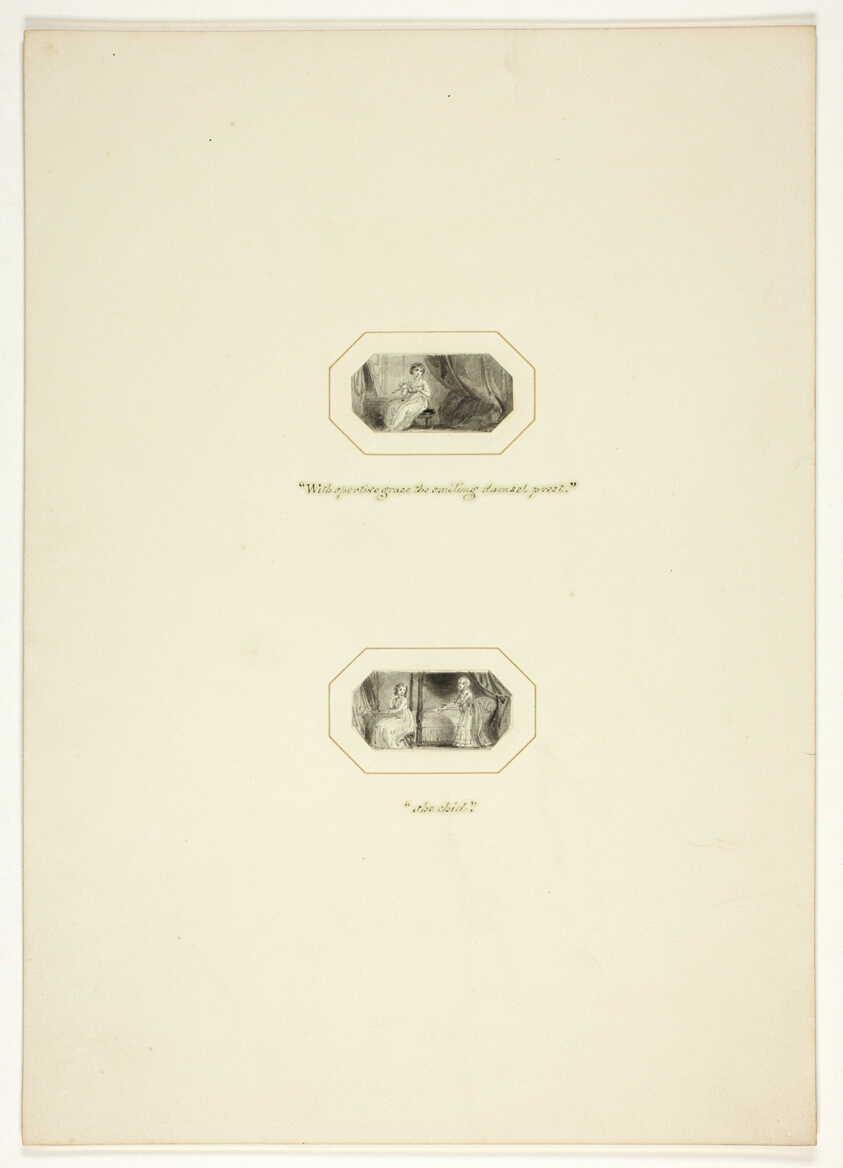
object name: Drawing and Watercolor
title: Study for a plate from The Triumphs of Temper, in the 1796 Royal Engagements Pocket Book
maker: Thomas Stothard (English, 1755-1834)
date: c. 1795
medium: Ink wash on paper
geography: England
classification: ink or chalk wash; drawings (visual works); prints and drawing